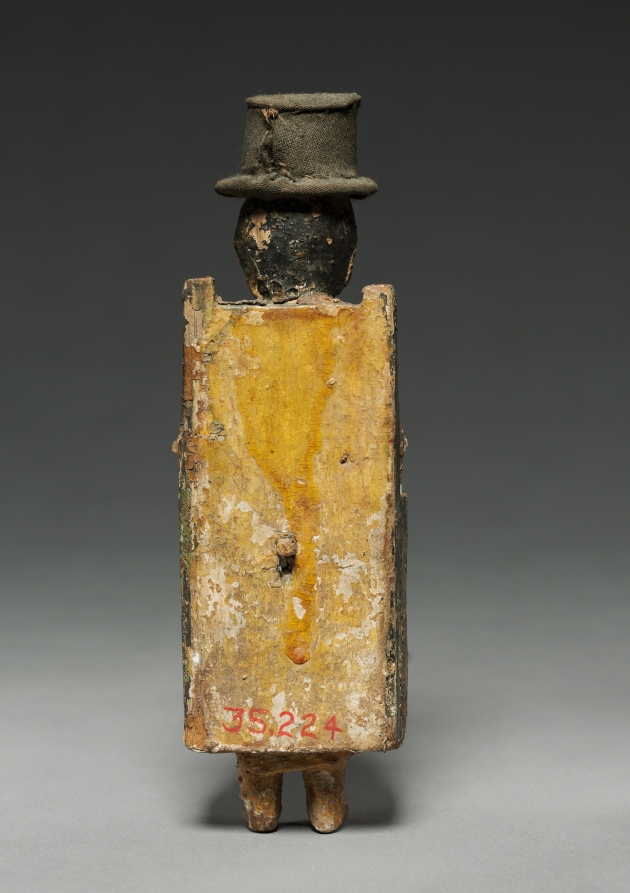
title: Christ Child: santo de bulto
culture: America, New Mexico, 17th-18th century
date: 1600s-1700s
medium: wood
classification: Sculpture